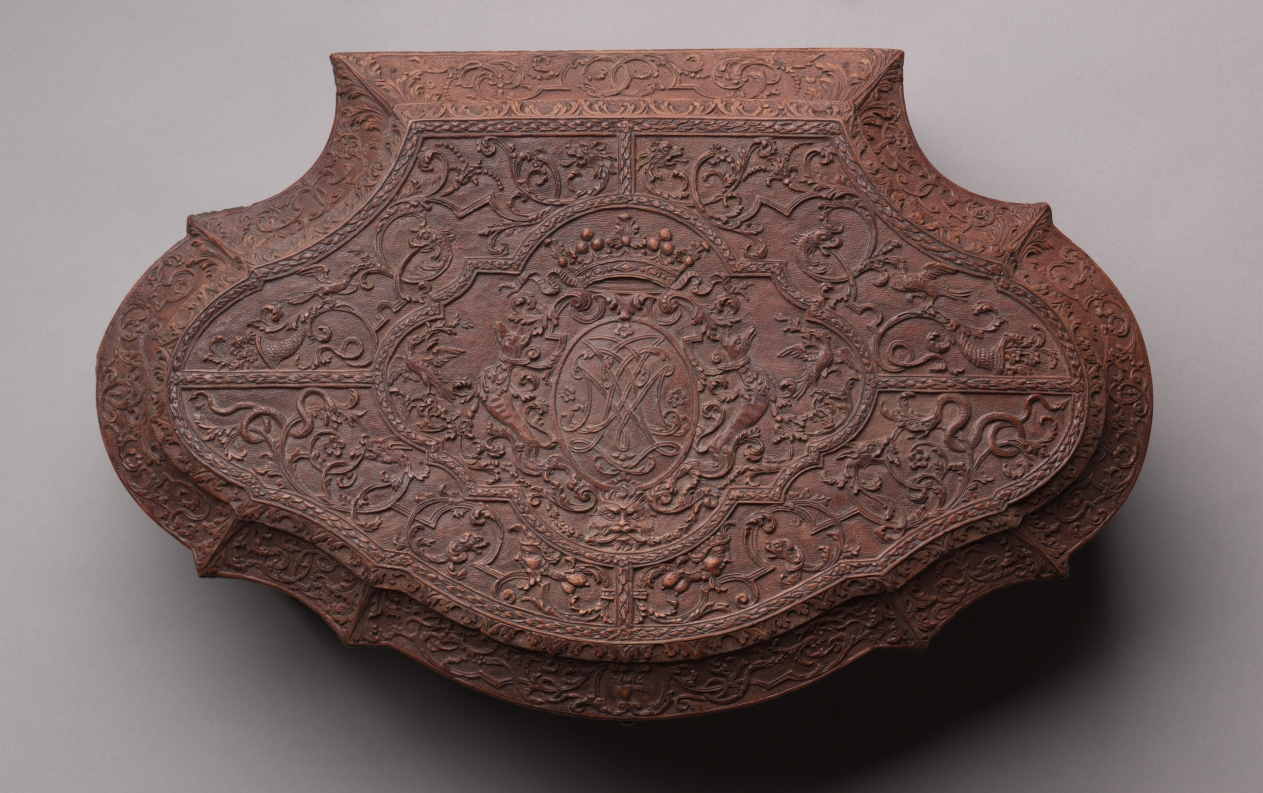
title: Box (1 of 2)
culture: France, Nancy, early 18th century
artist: Bagard (French)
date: early 1700s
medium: wood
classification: Furniture and woodwork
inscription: on top of box, initials crowned by coronet